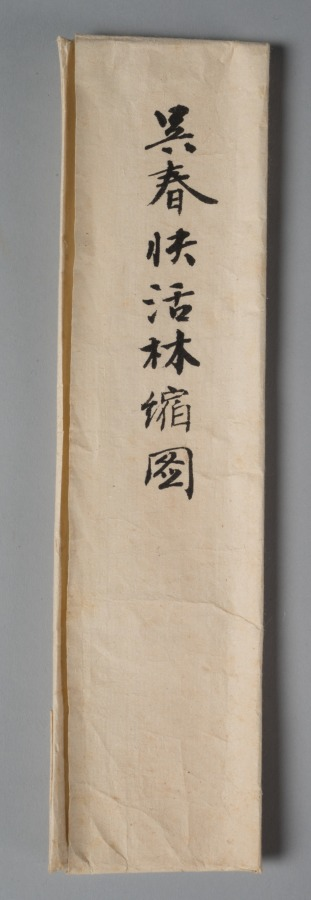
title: Happy Forest, from Water Margin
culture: Japan, Edo period (1615–1868)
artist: Matsumura Goshun (Japanese, 1752–1811)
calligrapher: and Amenomori Shōteki (Japanese, 1731–1786)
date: late 1700s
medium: hanging scroll; ink and color on paper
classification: Painting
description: The Chinese literary classic Water Margin is set in the 1120s and tells the story of 108 outlaws who first rebel against the government and then join forces with it. This painting depicts an episode in which hero Wu Song reclaims the tavern Happy Forest for its rightful owner, the prison warden’s son, Shi En. To prepare for the fight, Wu Song drinks a lot of wine. The painting was inscribed with a quote in which an ally describes Wu Song’s fighting style. It reads as follows: Where his twin fists rise, clouds and thunder roar, When his flying kick comes, wind and rain tremble.